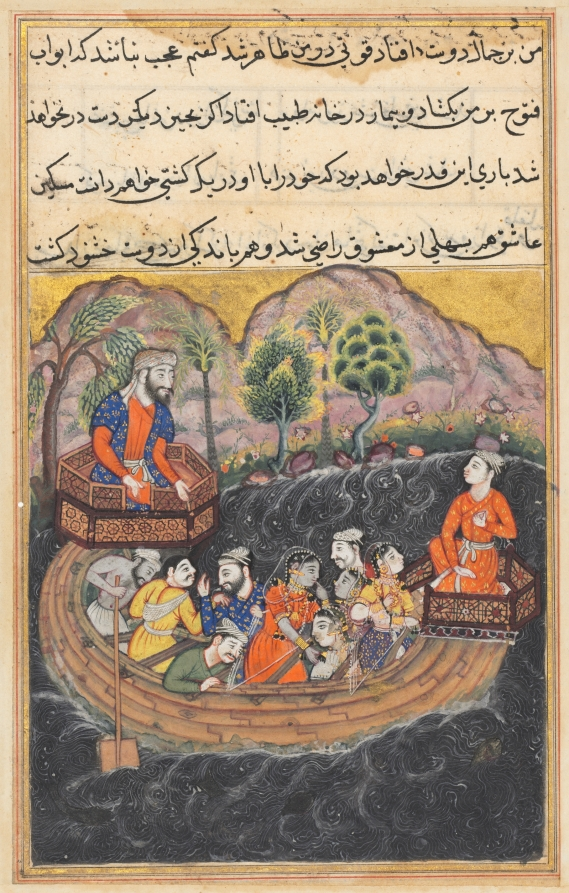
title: The young man of Baghdad joins the Hashimi’s boat as a sailor to find his slave-girl on board, from a Tuti-nama (Tales of a Parrot): Forty-eighth Night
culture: Mughal India, court of Akbar (reigned 1556–1605)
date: c. 1560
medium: gum tempera, ink, and gold on paper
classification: Painting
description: After losing all his possessions, the destitute young man joins the crew of a merchant ship. Upon boarding, he quickly realizes that this ship belongs to the same merchant who purchased his lover, the slave girl. She stands in the center of the boat, her finger raised in a gesture of shock, gazing toward her long-lost love.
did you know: The title “Hashimi” designates the bearer as a descendant of the Prophet Muhammad’s great-grandfather, Hashim.